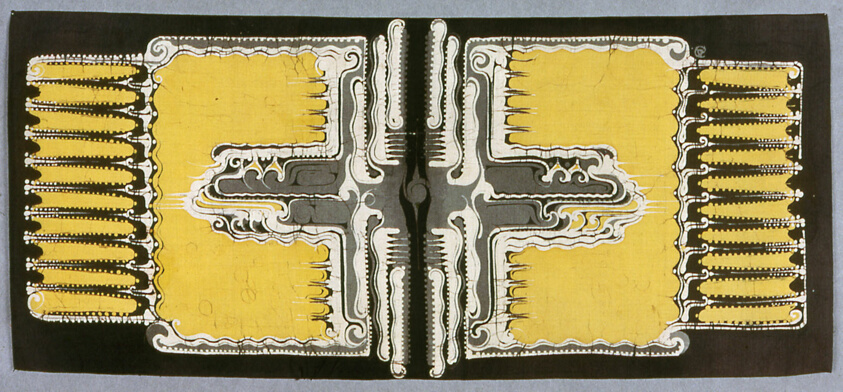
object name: Textile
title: Bookcover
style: Modernism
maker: Dutch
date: c. 1910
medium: Silk, plain weave; batik dyed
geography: Netherlands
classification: textile; weaving - printed